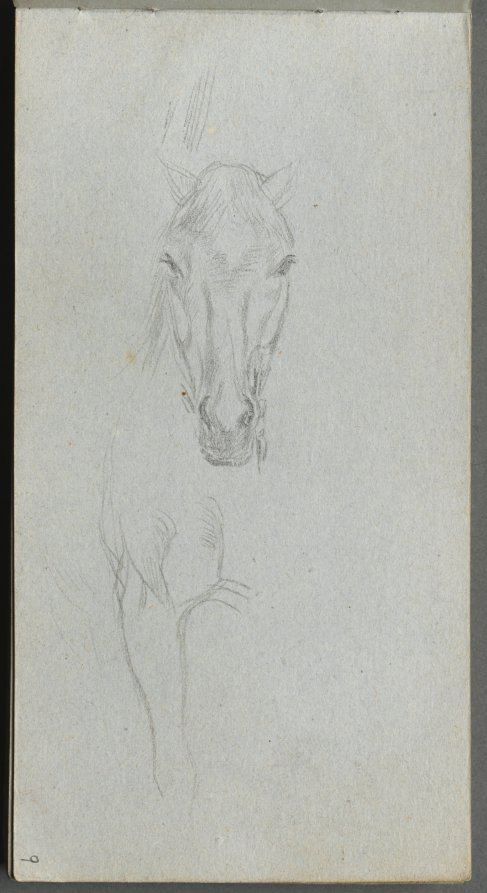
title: Sketchbook, page 09: Study of a Horse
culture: France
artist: Ernest Meissonier (French, 1815–1891)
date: c. 1860s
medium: graphite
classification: Bound Volume